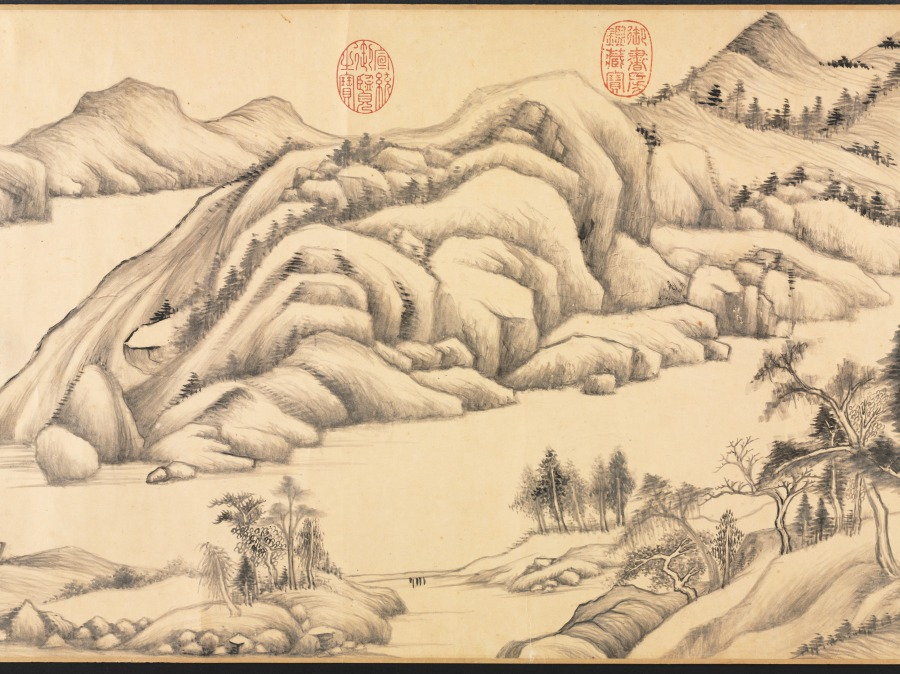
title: River and Mountains on a Clear Autumn Day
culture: China, Ming dynasty (1368–1644)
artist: Dong Qichang (Chinese, 1555–1636)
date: c. 1624–27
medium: Handscroll; ink on Korean paper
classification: Painting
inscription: 黃子久江山秋霽似此，當恨古人不見我也。思翁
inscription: 董文敏每遇高麗鏡面箋，書畫尤為入神。此卷改表紙用之，字跡隱然，兼有朝鮮之印。至於筆法圓秀，真接倪黃。豈文沈所可同日而語也。 康熙庚午中秋後一日，天氣澄爽，重裝初畢，跋於瓶廬。抱瓮翁高士奇。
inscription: Second inscription by Gao Shiqi 高士奇 (1645–1704): On the twenty-third day of the ninth month, the jiaxu year of the Kangxi era [1694], I packed my bags to head north. When my boat passed Wuchang [Suzhou], Mr. Mantang [Song Luo] brought wine to bid me farewell so that we could share our thoughts on our separation in the last few years. I showed him the paintings and calligraphy which I collected and asked his opinions. Since Mr. Mantang does not own any handscrolls by Wenmin [Dong Qichang], I leave this one for him in commemoration of our parting; thus the painting will have a worthy owner and our meeting will become a beautiful story in the future. It is the fourth day after the beginning of winter, with the sky clear and sober. Trees under frost have turned red and yellow, seemingly echoing the brush and ink in the painting. I also ask Mr. Mantang to inscribe a poem to commemorate our meeting so that it will survive forever.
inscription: 1 colophon and 4 seals of Song Luo 宋犖 (1634–1713): Who is the foremost art connoisseur of our dynasty?/ Tangcun [Liang Qingbiao, 1620–1691] is dead, so the title passes to Jiangcun [Gao Shiqi]./ Leaving office, you retired for five years in the Lake region./ Fondling handscrolls and hanging scrolls from morning to evening./ You sent me your collection catalogue Xiao Xia Lu last year;/ It is indeed the true equal of [Zhou Mi's] Yun Yan Guo Yan./ This year you returned to the capital by imperial order;/ Your boat with calligraphy and paintings anchored at the river bank in Suzhou./ When we met each other you did not waste any time for conversation by poured out immediately/ From your "coral net" extraordinary treasures./ You produced incomparable scrolls, with gold-inscribed labels and jade rollers,/ Pouring out from bags and trunks, they were spread in disarray./ Without a word, I rolled and unrolled until my fingers were numbed,/ We sat straight, facing each other quietly, and never felt tired./ For three days we forgot about sleeping and food./ And at times we shouted our joy out loud, forgetting who is host or guest./ Your Dwelling in the Fuchun Mountains and the Yuansheng manuscript/ These peerless works I myself examined with delight./ As an added pleasure to the farewell dinner under the Maple Bridge,/ You allowed me to hold again this handscroll by Dong Qichang--/ The Misty River and Piled Peaks [by Zhao Mengfu] and this Clear Autumn Day are two extraordinary masterpieces./ In showing such life and spirit with "qi yun." the artists were truly "men of heaven."/ The Clear Autumn Day is not even three feet long,/ Painted on tributary Korean paper, it shines like silver./ Every building up and every turn of the mountains imitates nature,/ Every tree and every rock is removed from the commonplace./ From the beginning, the theory of poetry is the theory of painting,/ Like the lotus and the morning sunshine, they complement and refresh each other./ The artist's inscription regrets that "the Old Masters cannot see my scroll."/ Huang Gongwang would have agreed in his grave./ The vermilion of the seals glitter and dazzles the eyes,/ These added accessories are as valuable as jade./ You are very kind to give it to me,/ The feelings expressed in your inscription are so sincere./ Wanting to refuse, but unable, I accept it to respect your wish,/ And taking off my gown and cap I wrapped it with care./ You asked me to write a long poem in commemoration of this beautiful occasion,/ I am too ashamed that my effort in response is so poor and inadequate./ Returning home, I unrolled it under candlelight, trying to write the colophon,/ The light of the waning moon shines at the foot of the mossy wall./ Earnestly humming and brows knit in deep thought, I try to compose;/ The verses are not outstanding, but the facts are real./ With this poem recorded at the end of the scroll, I mail it to you for approval,/ This poem and this painting shall outlast a thousand springs. (Translation by LYSL/HK/WKH)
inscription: 1 colophon and 2 seals of Shao Changheng 邵長蘅 (1637–1704); 2 inscriptions and 14 seals of the Qianlong 乾隆 emperor (r. 1736–95); 1 seal of the Jiaqing 嘉慶 emperor (r. 1796–1820); 3 seals of the Xuantong 宣統 emperor (r. 1908–11); 1 seal unidentified.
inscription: [印] 朝鮮國王之印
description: Dong Qichang had a tremendous impact on the artistic practices and historiography of later generations; his works and writings shaped literati aesthetics. Here, Dong places an abstract landscape composition diagonally across the picture plane, configured to recall earlier masters and simultaneously express his own personal style. Dong’s inscription claims, Huang Gongwang’s Autumn Day, looks like this. I truly regret the master has not seen my work. In fact, Dong Qichang may have had Dong Yuan’s Xiao and Xiang Rivers in mind, a work he owned and considered a key work in Chinese art history.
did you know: The painting has an imprint of a Korean seal that reads "Seal of the king of Joseon."